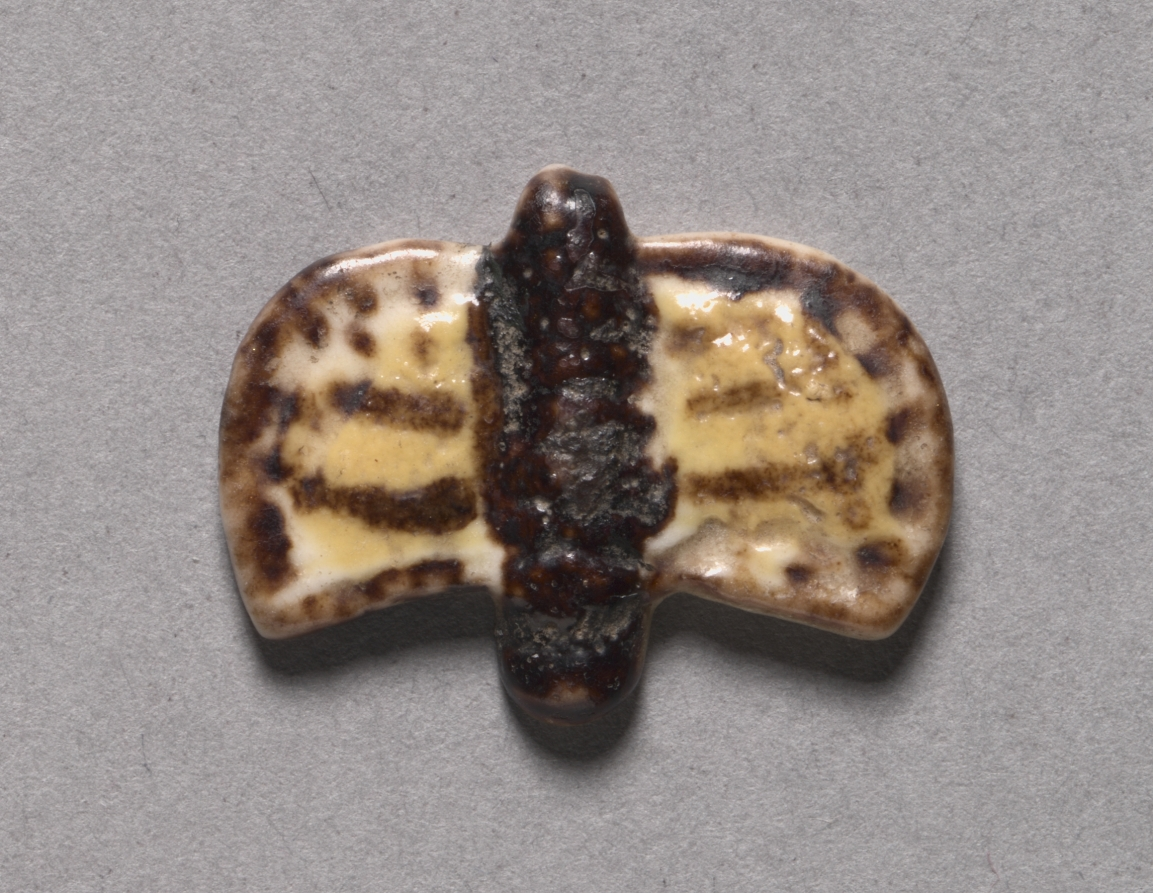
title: Butterfly Inlay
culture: Egypt, New Kingdom (1540–1069 BCE), Dynasty 18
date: 1350–1296 BCE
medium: polychrome faience with painted decoration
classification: Amulets